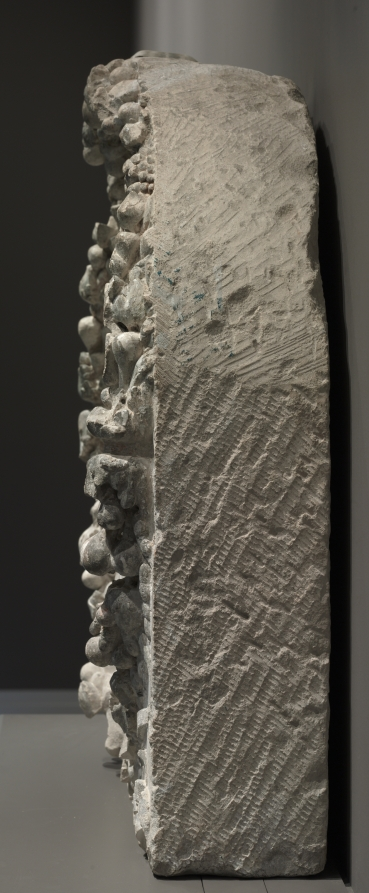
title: Julius Caesar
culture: Italy, Florence, 15th century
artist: Mino da Fiesole (Italian, c. 1430–1484)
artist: garland by Mino da Fiesole and Workshop (Italian, c. 1430–1484)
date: c. 1455–60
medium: marble with traces of bole (red clay) and limestone with traces of paint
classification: Sculpture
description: Renowned Roman general and statesman Julius Caesar (100–44 BCE) appears here as a political rather than military leader, worn by the burdens of office, with carefully described signs of aging. Mino probably used ancient coins from the collection of the Medici, Florence's ruling family, as his starting point for this sculpture. However, the complex carving, the clinging drapery, and the psychological intensity all characterize the inventiveness Renaissance artists brought to classical subject matter. In this case, Caesar offered an important model for leadership, masculinity, and composure. The garland is clearly by a different hand, but passages, such as the ribbons and flowers in low relief, correspond to details found in other decorative carvings from Mino's workshop. Initially, the limestone setting was probably put into a wall, perhaps in a lunette over the door, from which it was later removed. However, the relationship between the garland and the relief has not yet been clarified and is the subject of ongoing research.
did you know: Traces of paint on this white marble relief indicated that it was once brightly painted.